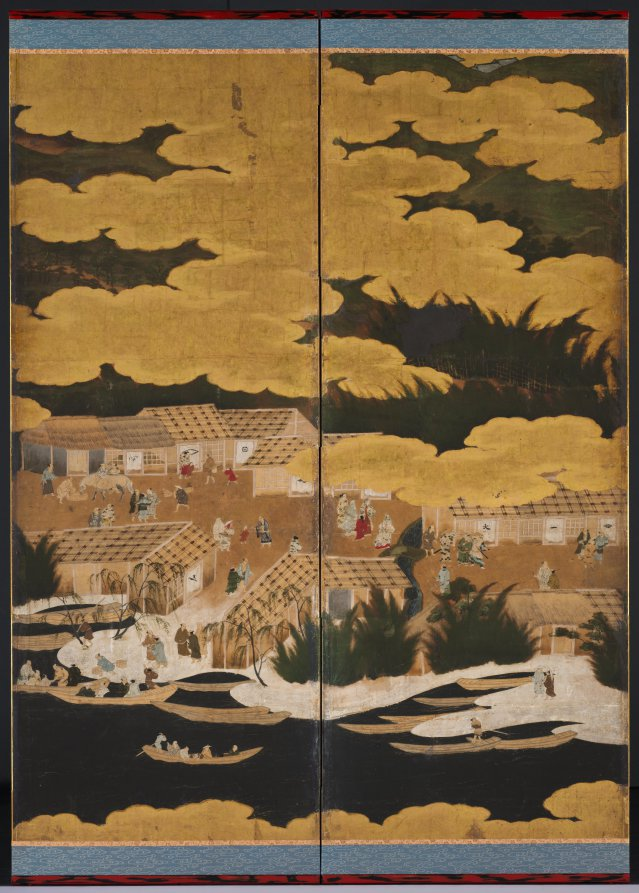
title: Famous Views of Ōmi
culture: Japan, Edo period (1615–1868)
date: 1660s–90s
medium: One of a pair of six-panel folding screens; ink, color, and gold on gilded paper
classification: Painting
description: Ōmi is an area around Lake Biwa near Kyoto. The Shinto shrine Hiyoshi Taisha and the Buddhist temple Ishiyamadera are in the upper right and upper left of the composition, respectively. At center is the pilgrimage route and people in the town before the temple gates. Harvested rice fields to the right and flowering cherry blossom trees at left show seasonal change from winter to spring.